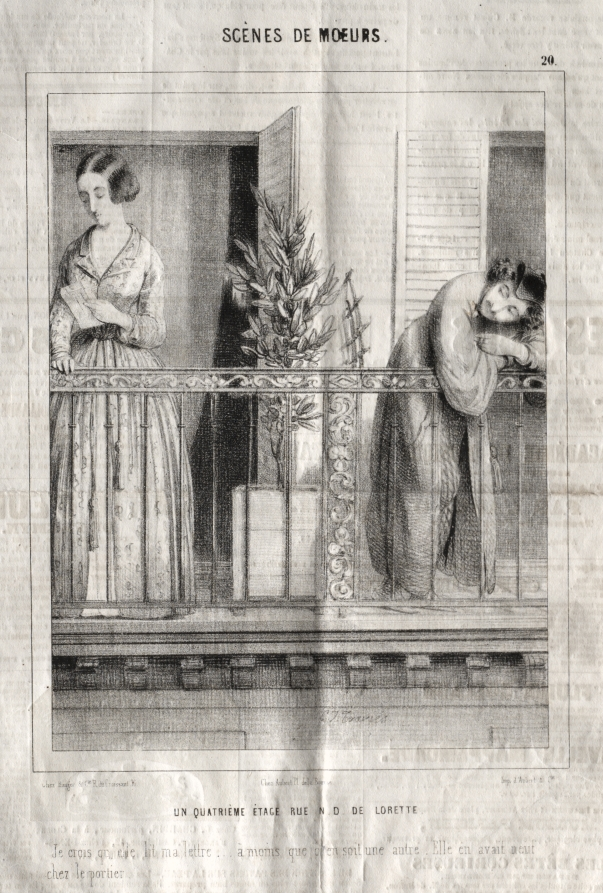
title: Scènes de moeurs: Un quatrieme étage rue N. D. de Lorette. Je crois qu'elle lit ma lettre...à moins que c'en soit une autre. Elle en avait neuf chez le portier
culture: France, 19th century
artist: Charles Joseph Traviès de Villers (French, 1804–1859)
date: c. 1830–45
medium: lithograph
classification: Print